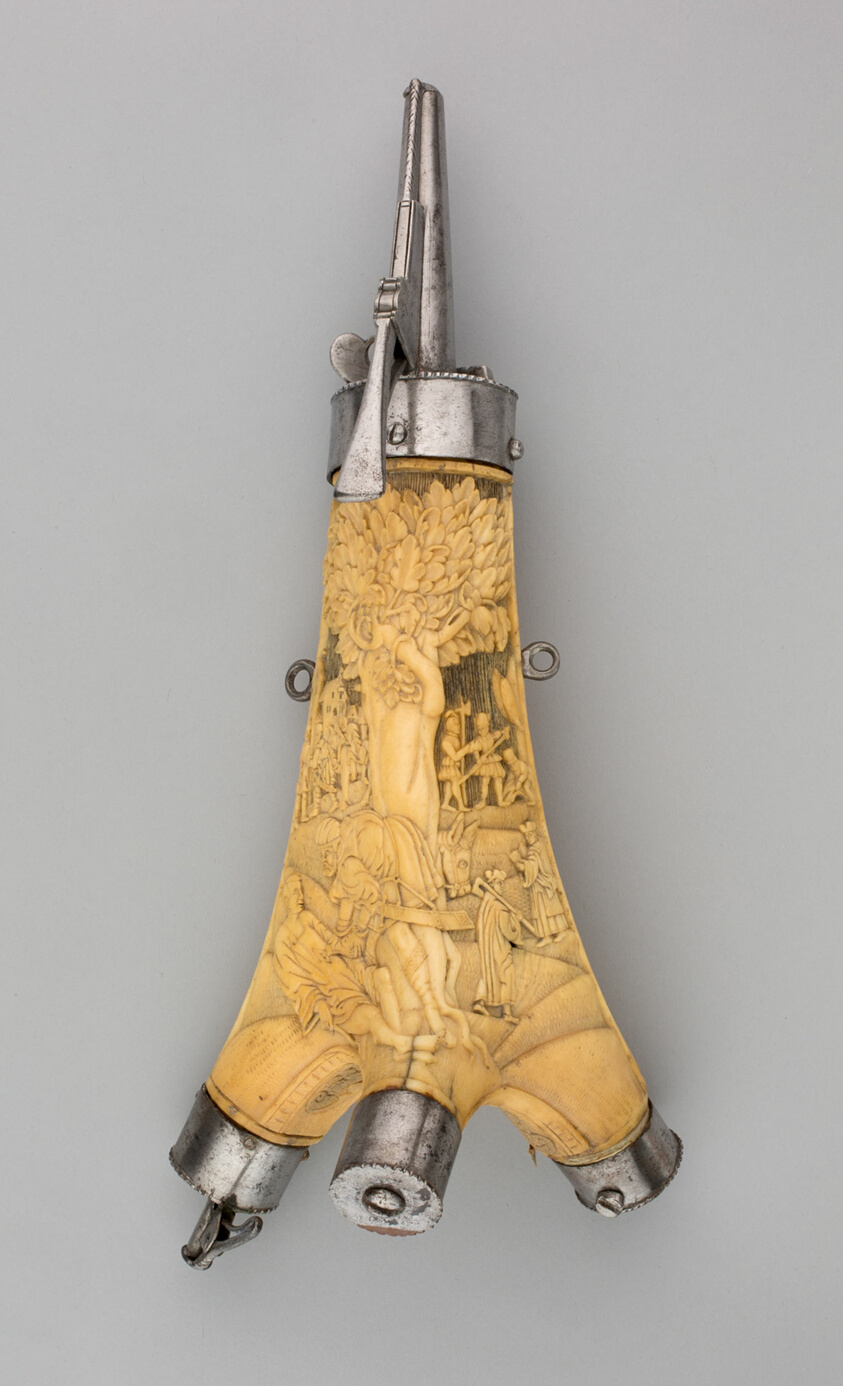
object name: Arms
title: Powder Flask Carved with the Parable of the Good Samaritan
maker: German or French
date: 1570/1600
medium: Staghorn, iron, and steel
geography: Southern Germany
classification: firearm-accessory; arms; arms and armor